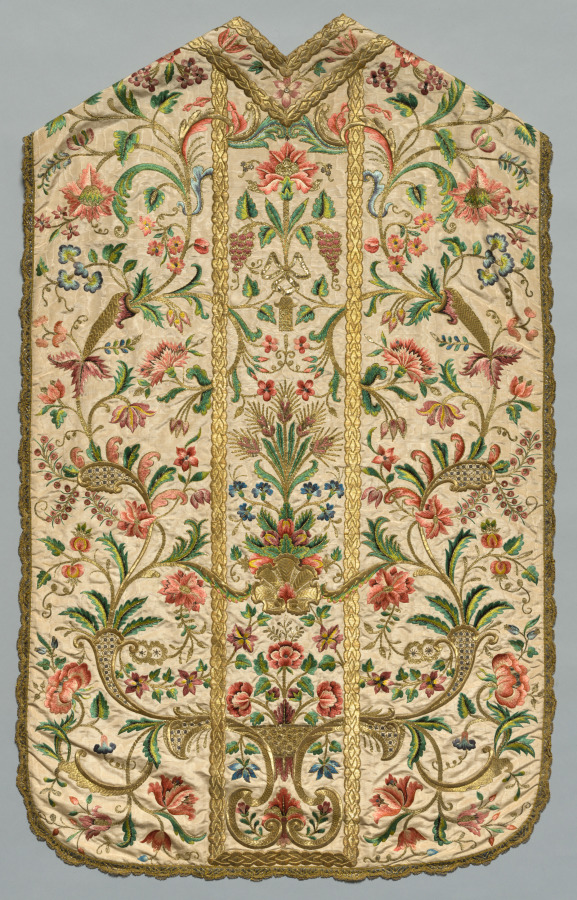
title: Chasuble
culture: Italy, 18th century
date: 1700s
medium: Silk and metallic threads; embroidery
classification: Textile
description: A beautiful design emanates from a vase in the center of this chasuble, displaying symmetrical flora that extend across embroidered gold braids into graceful curvilinear cartouches, reflecting contemporary architectural decoration. Also in the center, sheaves of wheat and grapes represent the bread and wine of the Mass. Gold sequins within thread-outlined squares illustrate fine quality workmanship. The decoration of the stole and chalice veil is similar to the chasuble, also on moiré (watered) silk fabric. The stole, an insignia of the office of deacons and priests, is worn under a chasuble, and the chalice veil—bearing the monogram of Jesus Christ, ihs, in the center—covers the chalice and paten (the plate holding the Eucharistic bread).